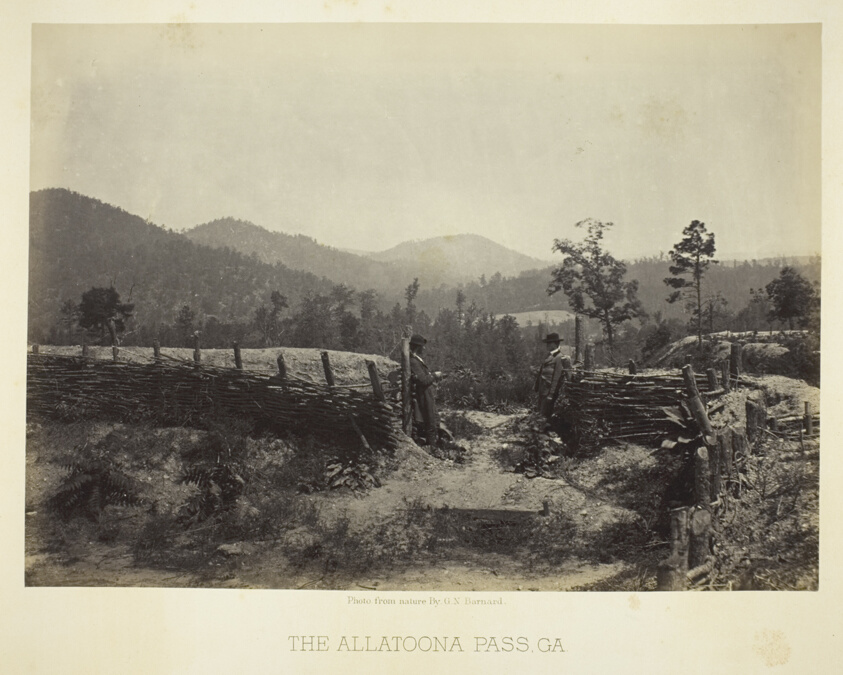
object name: Photograph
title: The Allatoona Pass, GA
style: 19th century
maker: George N. Barnard (American, 1819–1902)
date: 1866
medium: Albumen print, plate 29 from the album "Photographic Views of the Sherman Campaign" (1866)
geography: United States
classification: albumen silver print; photographic process; photography; photograph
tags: Collected by Hugh Edwards, Sherman's Campaign 1866